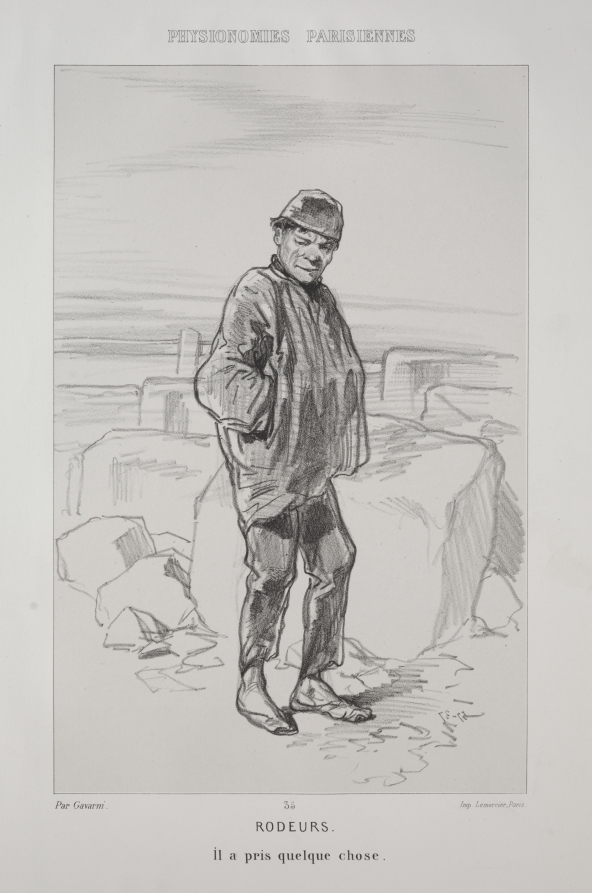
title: Rodeurs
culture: France, 19th century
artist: Paul Gavarni (French, 1804–1866)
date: c. 1857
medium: lithograph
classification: Print